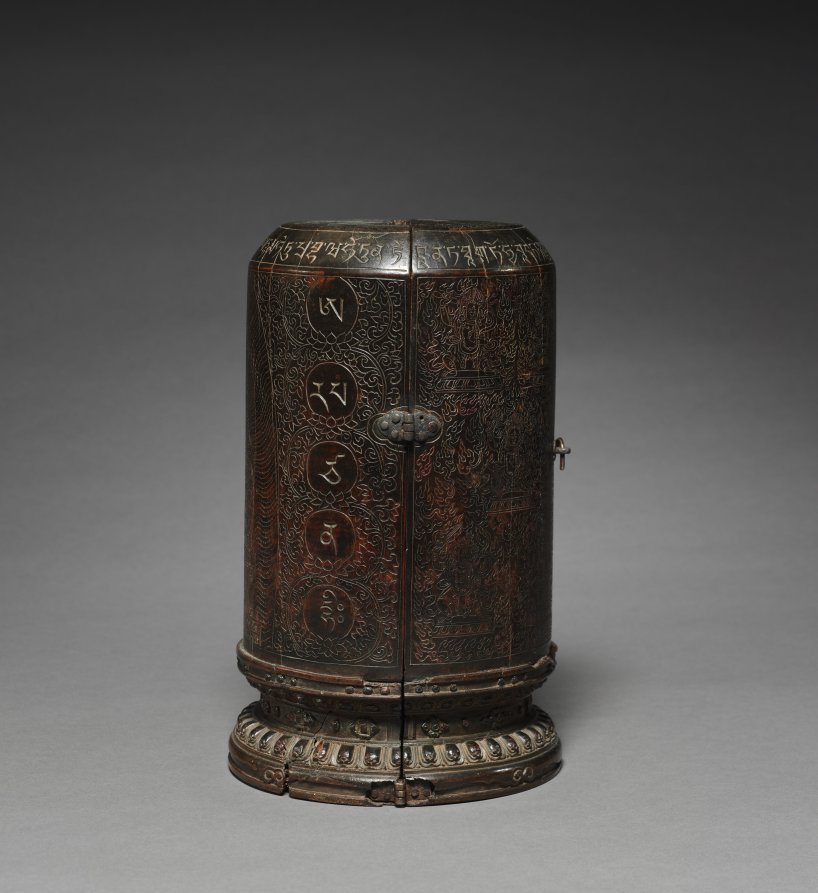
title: Portable Shrine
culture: Tibet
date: c. 1500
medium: wood with mineral pigments and metal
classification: Sculpture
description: Carved from a solid section of a log, the shrine contains images of protectors of tantric Buddhism—a branch that developed in northern India and became prominent in the Himalayas by the 700s. The central figure in the top row is Padmasambhava (Indian, active in Tibet in the 740s), venerated as the founder of one of the four main Tibetan monastic orders. Incised on the exterior are images of protectors, mantras written in Tibetan script, and a sacred funerary monument called a stupa. Tantric practice emphasizes recitation of mantras that invoke the powers of compassion, wisdom, and protection.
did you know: Tantric practice can be performed alone in any location; this shrine could be used by a traveling practitioner for meditation, visualization, prayer, and recitation of mantras.